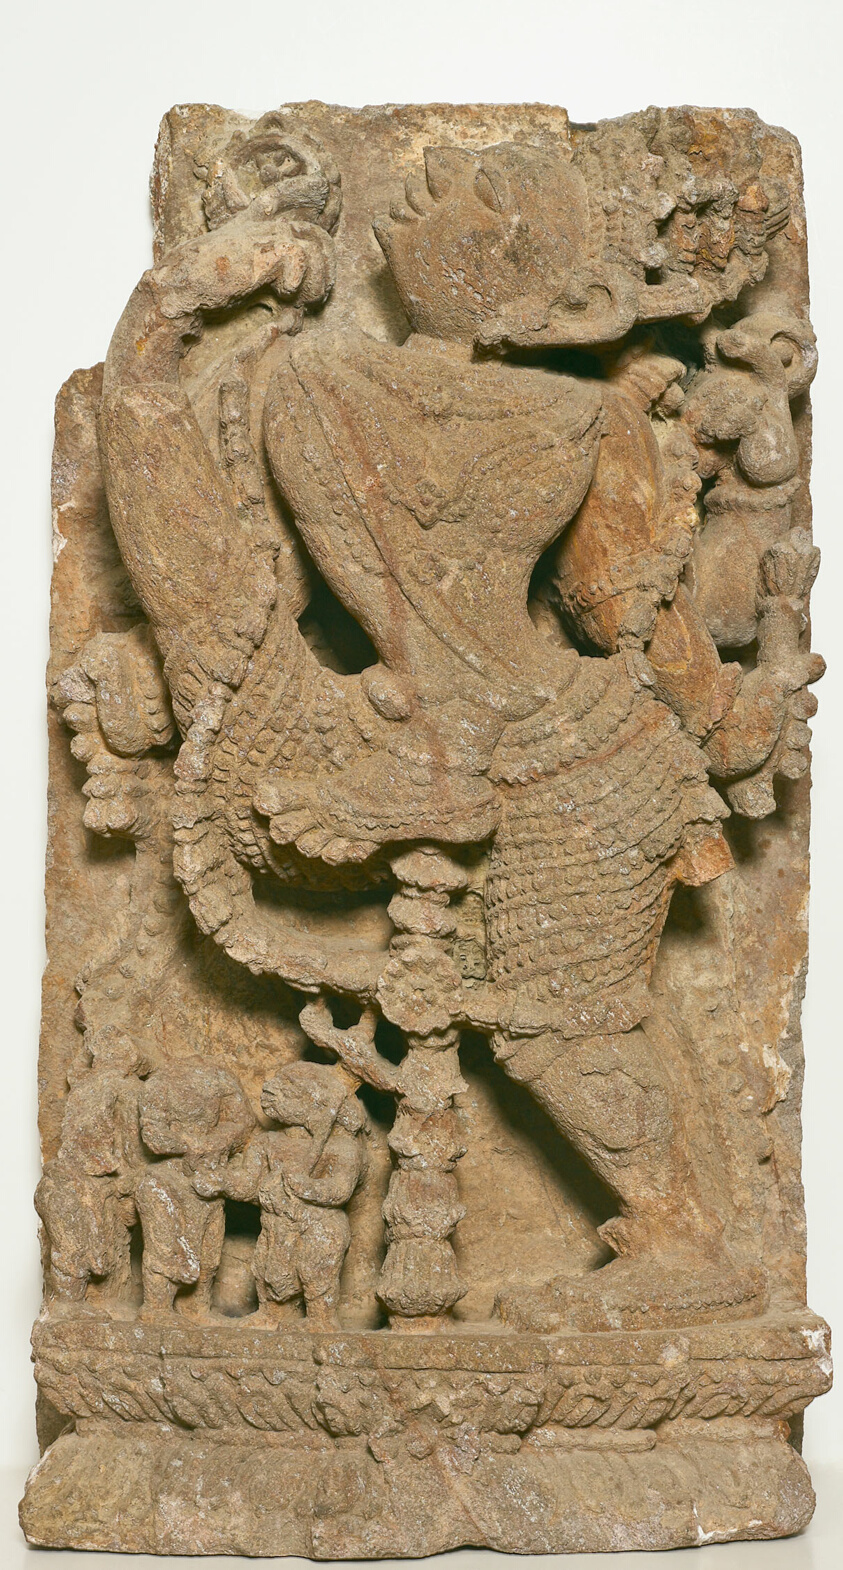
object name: Sculpture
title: God Vishnu Measures the Universe in Three Strides (Trivikrama)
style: South Asian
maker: India; Odisha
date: About 12th century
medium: Gneissic rock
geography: Odisha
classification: stone; asian art; sculpture